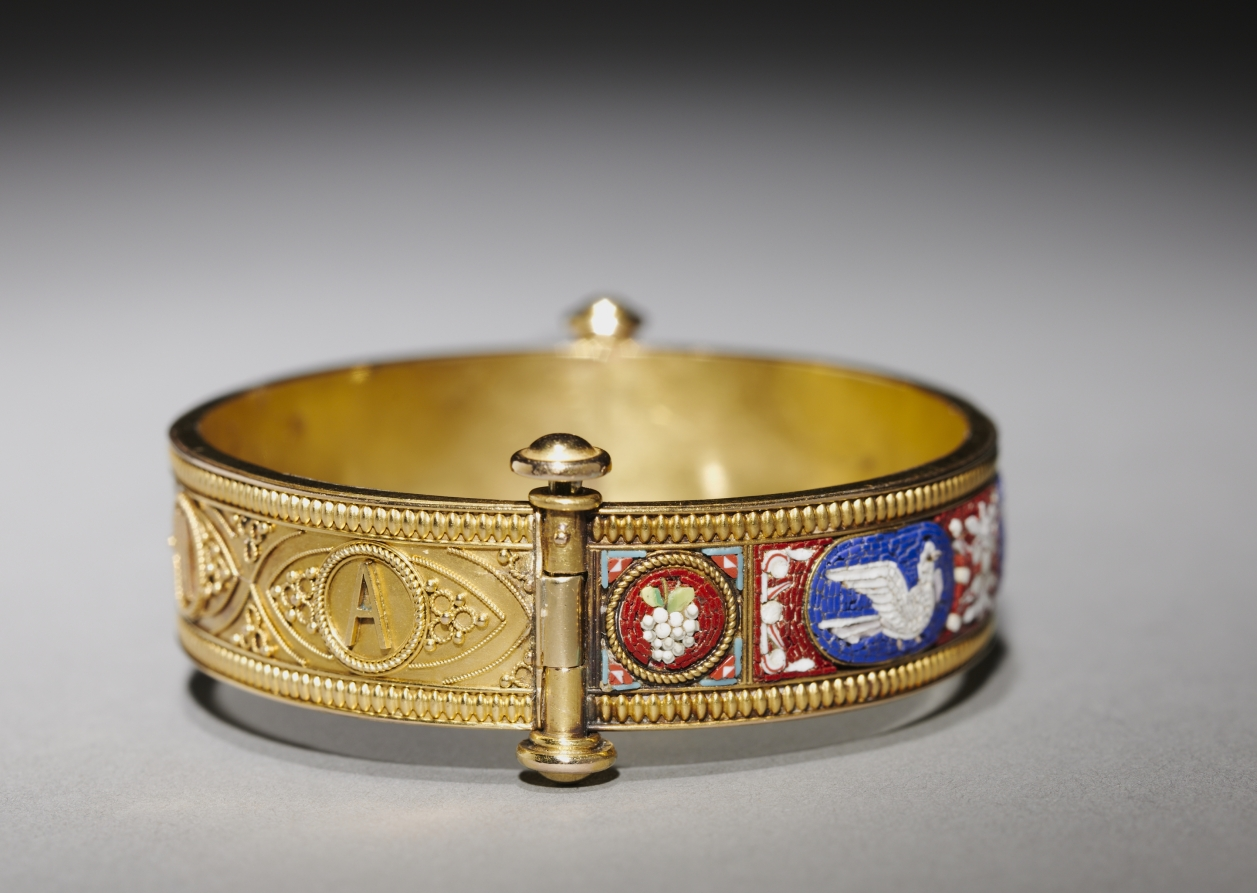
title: Bangle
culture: Italy, Rome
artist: attributed to Fortunato Pio Castellani Firm (Italian)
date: c. 1860–70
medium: gold, glass mosaic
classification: Jewelry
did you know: This bracelet is decorated with tiny tesserae or pieces of glass that create a micro-mosaic.